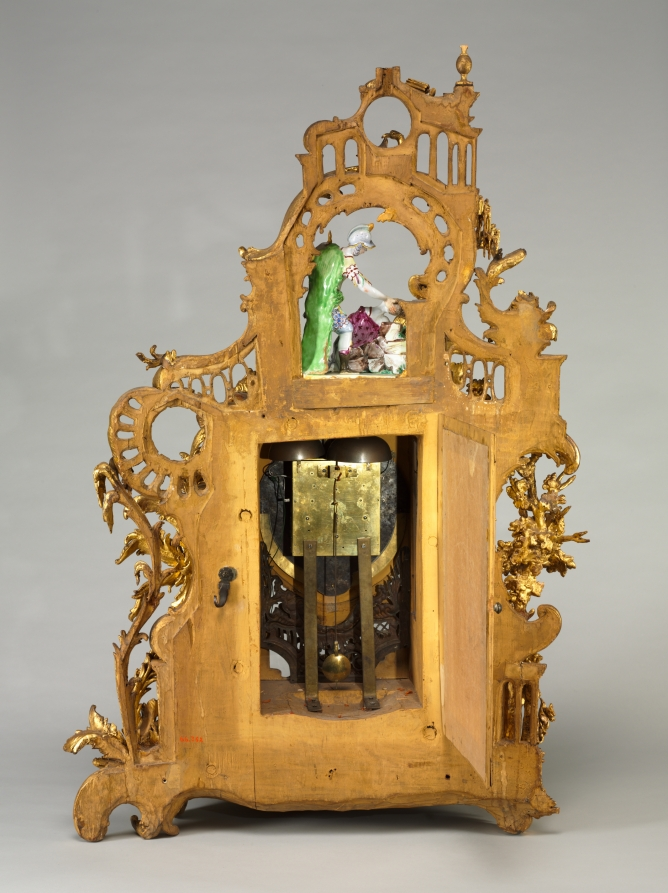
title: Clock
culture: Germany, 18th century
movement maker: Baumgartinger (German)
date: c. 1750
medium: carved and gilded wood, faience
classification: Furniture and woodwork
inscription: inscribed on face: Baumgartnger [sic] Mergentheim.